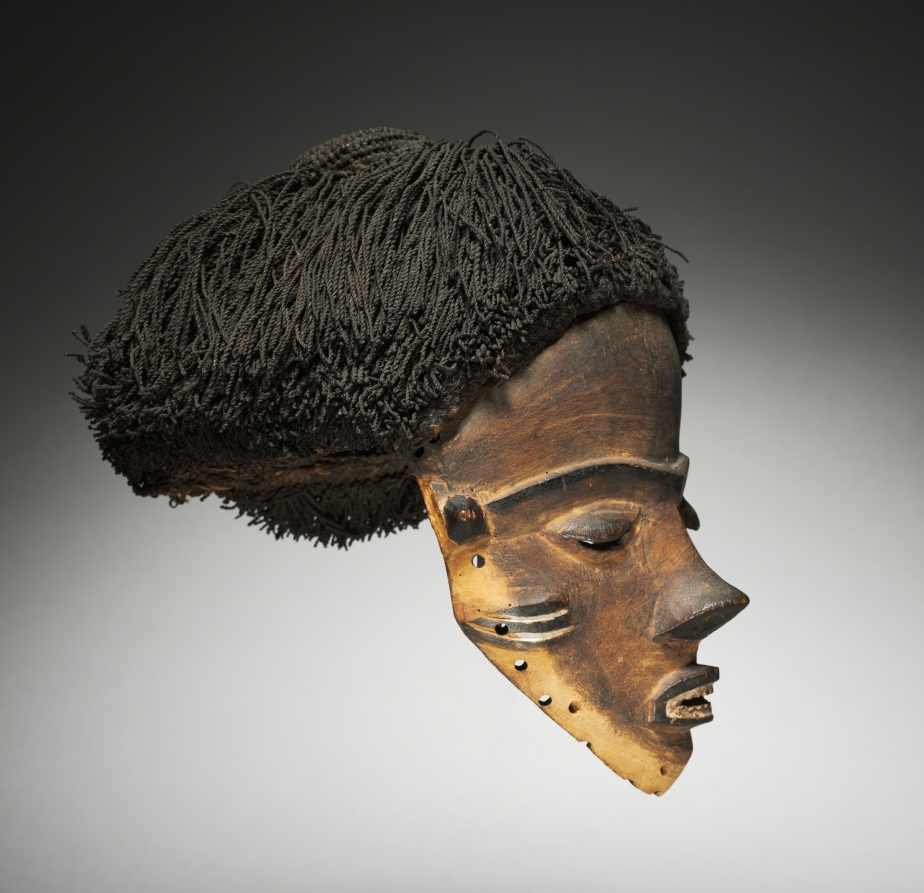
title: Female Mask (Gambanda or Kambanda)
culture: Africa, Central Africa, Democratic Republic of Congo, Pende-style maker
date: early 1900s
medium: Wood, plant fiber, and colorant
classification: Mask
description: Realized in typical Central Pende style, this mask is believed to represent gambanda, the chief's wife. In light of Pende theories about gender and physiognomy, the mask is an ideal expression of a woman's facial features and thus reflects her calm, obedient, peaceful, and self-controlled demeanor. The intricate hairstyle consisting of hundreds of miniature twists imitates a once fashionable hairdo. Pende sculptors inherited their position and often worked on the outskirts of the village so that few could see them at work.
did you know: This female mask would have performed in a collective multimedia event with audience participation.